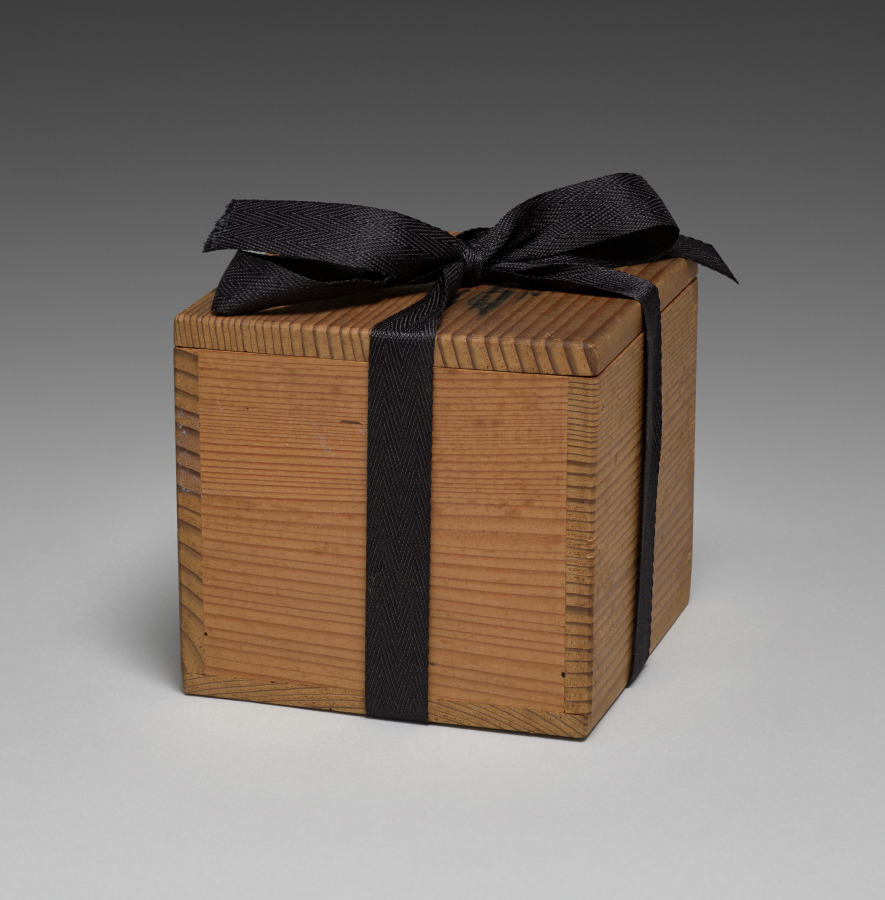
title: Teapot with Begonias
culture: Japan, Meiji period (1868–1912)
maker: Seifū Yohei III (Japanese, 1851–1914)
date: 1897–1914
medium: Porcelain with underglaze and overglaze colors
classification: Ceramic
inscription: 清風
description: This teapot has complex surface treatment: a design of begonias in modulated underglaze blue for the leaves and stems as well as thick overglaze white with incised lines to define the petals, plus small areas of underglaze yellow at their low-relief centers. A band of underglaze blue gives further definition to the lid’s handle, and the area just above the base has a double band of blue above a row of snail-shell curls. Unlike many other teapots, which have marks on their bases, this one has “Seifu” incised into one of its sides in relatively large characters. It is the side that would face the host if the teapot were held by the handle with the right hand, which would be the expectation.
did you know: This teapot with begonias combines underglaze blue with subtle use of yellow and white enamels.